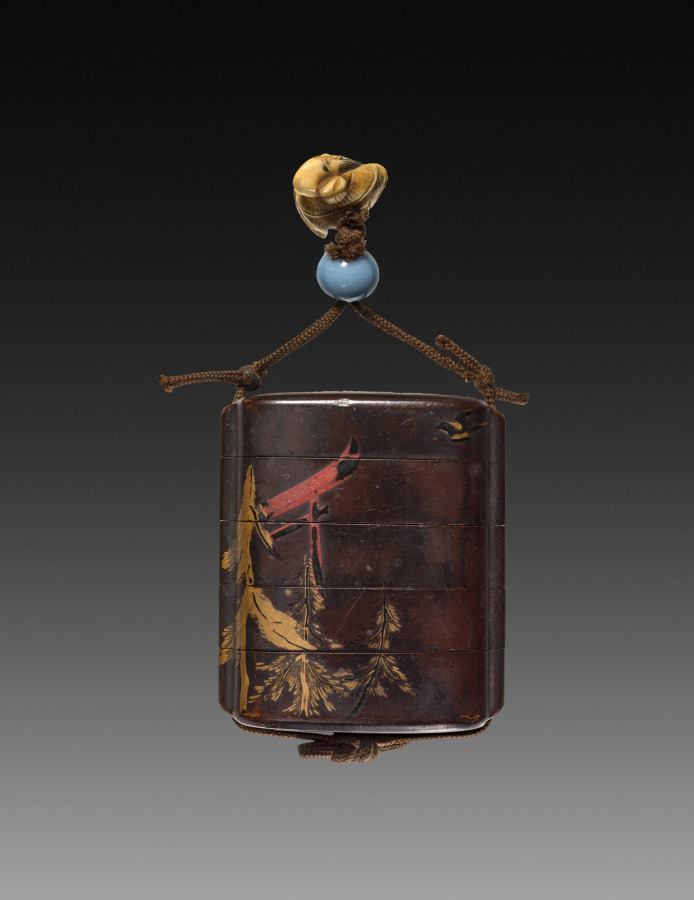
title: Inro with Shrine Gate and Figure Shooting Bird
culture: Japan, Edo period (1615–1868) to Meiji period (1868–1912)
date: mid-1800s to early 1900s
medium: lacquered wood, ivory, blue bead, gold leaf, pigment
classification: Lacquer